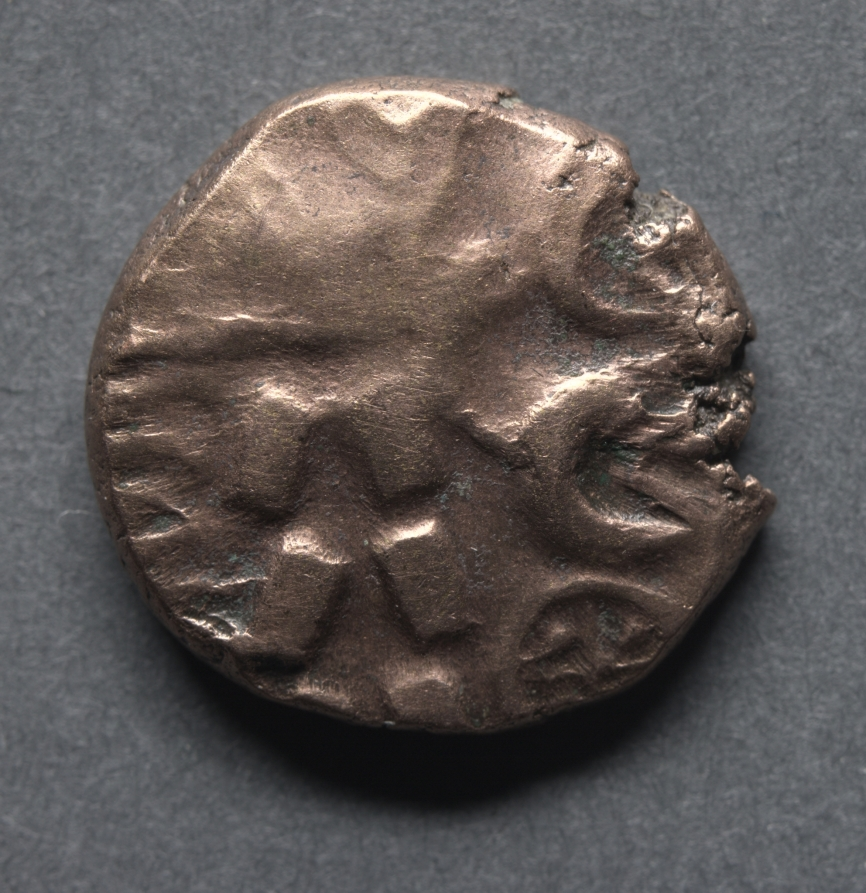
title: Stater: Wreath, Crescents, and Wheel (obverse)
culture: England, Corieltauvi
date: 10 BCE–30 CE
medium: gold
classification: Coins